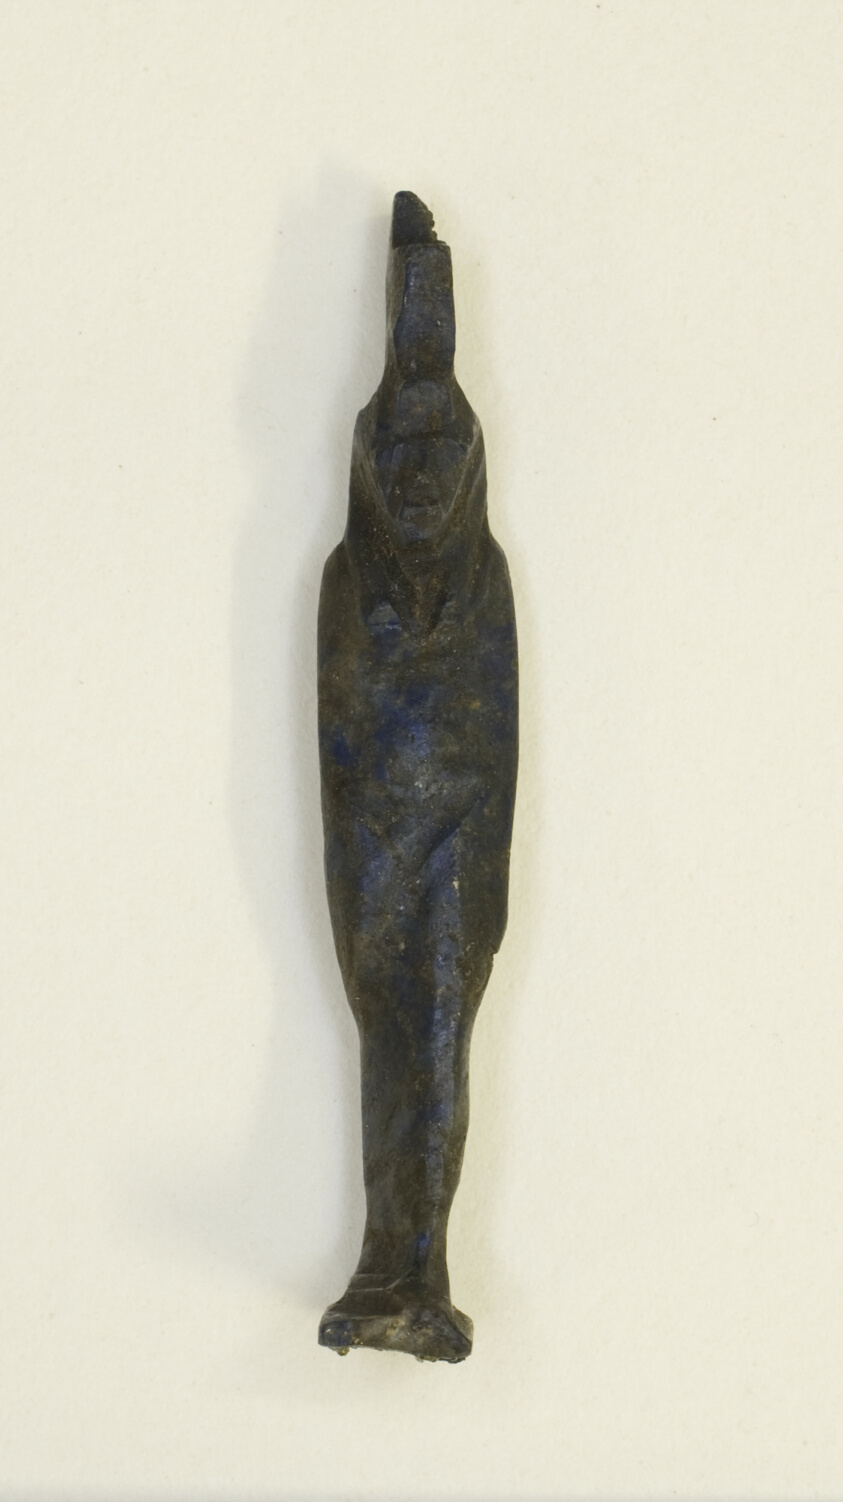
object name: Costume and Accessories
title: Amulet of the Goddess Isis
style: third intermediate period, egyptian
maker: Egyptian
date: Third Intermediate Period, Dynasty 21–25 (1070–656 BCE)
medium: Lapis lazuli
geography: Egypt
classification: amulet; jewelry; stone; ancient art; costume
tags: goddesses